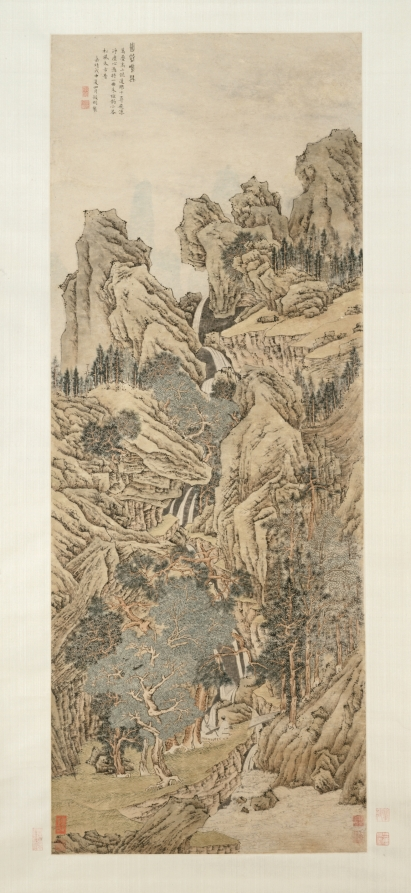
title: Playing the Qin in a Secluded Valley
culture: China, Ming dynasty (1368–1644)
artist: imitator of Wen Zhengming (Chinese, 1470–1559)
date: 1548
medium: hanging scroll; ink and light color on paper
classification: Painting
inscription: 幽壑鳴琴。 萬疊高山供道眼，千尋飛瀑淨塵心。 憑將一曲朱絃琴，小答松風太古音。 嘉慶戊申夏四月徵明製 [印] 徵明; 徵仲父印 [右下方] 悟言室印; 衡山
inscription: 4 additional seals: 3 of Cheng Qi 程琦 (1911–1988); 1 unidentified.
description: The poem inscribed in this painting reads: "Ten thousand layered lofty mountains are presented to the cultivated eye, A thousand feet of cascading falls cleanse the dusty heart. May the harmonies of my red-stringed tune Be the humble answer to the pine wind's ancient song." Different versions of this painting exist. Scholars have suggested that the solid renderings of the rock masses and the volumetric mountain configurations as seen here appear more characteristic of Lu Zhi 陸治 (1496–1576), Wen Zhengming's pupil.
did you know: In paintings, Chinese literati often play the instrument in a landscape setting, as the sound of the qin symbolizes harmony between man and nature.